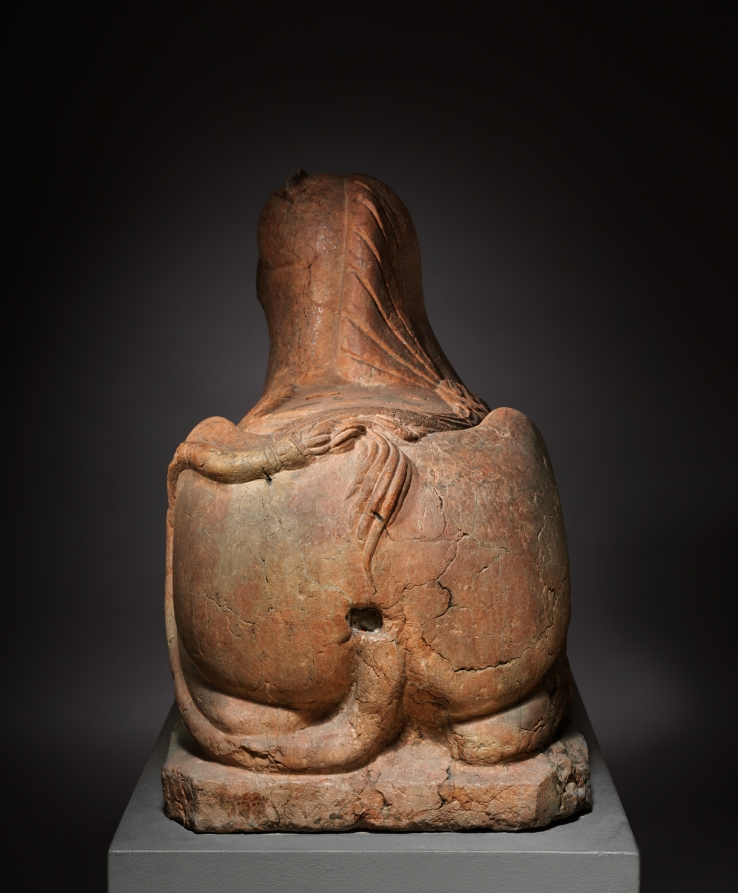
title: Guardian Griffin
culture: Northern Italy, Emilia, 12th century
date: 1150–1175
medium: pink limestone (called "Verona Marble")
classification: Sculpture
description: Griffins are fabled creatures that have the characteristics of an eagle and a lion--combining watchfulness and courage. In Christian art, the dual nature of the griffin was often used to signify that of Christ himself: divine (bird) and human (animal). Griffins were often used as guardian figures in church sculpture and were placed in portals and choir screens. The creatures seen here, with their inward-turning heads, were certainly used for such a purpose. When viewed from the front, one griffin may be seen protecting the figure of a knight between its paws, while the other griffin guards a calf. Their original function was probably to support the columns of a porch in front of a church doorway.